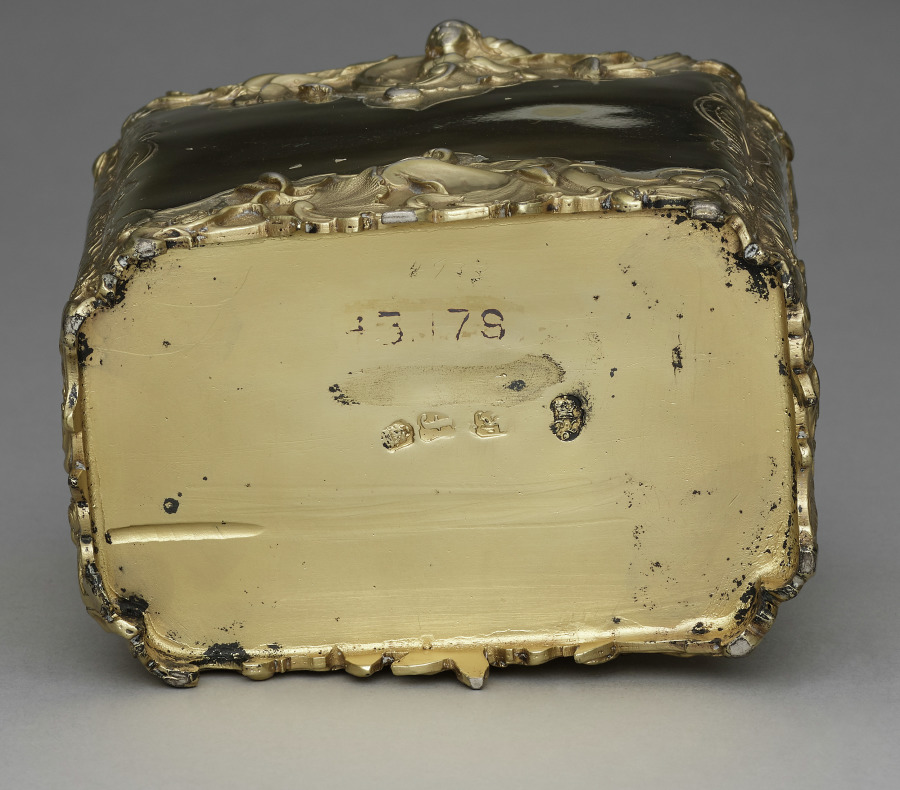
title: Tea Caddy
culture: England, London, 18th century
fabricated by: Paul Jacques de Lamerie (British, 1688–1751)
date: 1741–1742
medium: silver gilt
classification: Silver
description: In the 1600s and 1700s, silver played a significant role in projecting wealth, status, power, and ritual in British life. Tea was likewise a highly valued commodity, and as such, silver caddies like this one were designed to display the social distinction of its owner. This canister’s prominently sloping shoulders were designed by Paul Jacques de Lamerie in the early 1730s and became a standard form for tea caddies by the end of the decade.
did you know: This tea caddy is accompanied by a lid. See cover record.